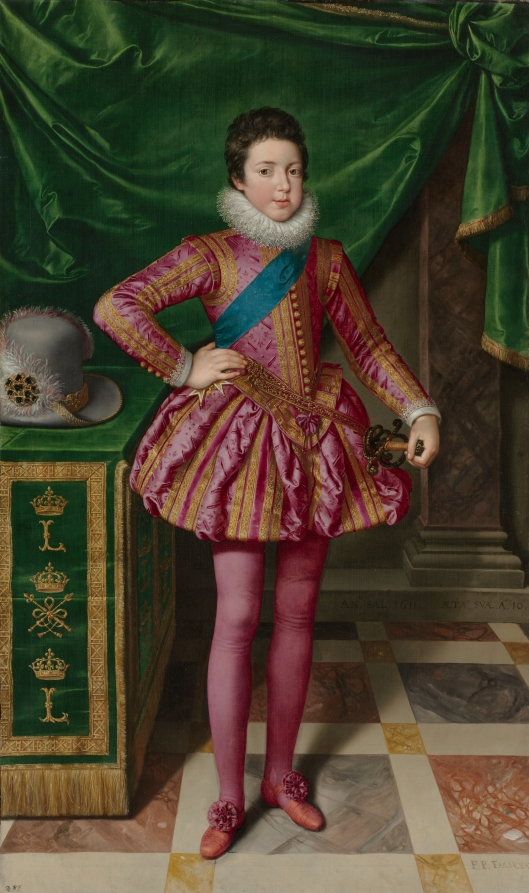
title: Portrait of King Louis XIII of France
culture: Flanders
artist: Frans Pourbus (Flemish, 1569–1622)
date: 1611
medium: oil on canvas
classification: Painting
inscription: Signed with the monogram lower right: F.P. FACIEBAT. Inscribed middle right: AN° SAL. 1611. AETA'. SVAE. A°. 10. Inscribed with inventory number lower left 783. Inscribed on the reverse, on a hand written label: brought back from Rome by J. W. Brigstocke of Carmarthen.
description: Although ten-year-old Louis XIII was king of France, his mother Marie de’ Medici remained in power until the boy officially came of age. Pourbus inscribed the sitter’s age and the painting’s year in the composition: “The holy year 1611 at his age of 10 years.” Marie de’ Medici commissioned this work as she negotiated marriages for her two children to Philip III of Spain and Mary Marguerite of Austria, alliances that led to the European domination of the next two centuries by the Bourbon and Habsburg families.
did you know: While the color pink has feminine associations now, it was commonly worn by girls and boys alike in the 1600s.